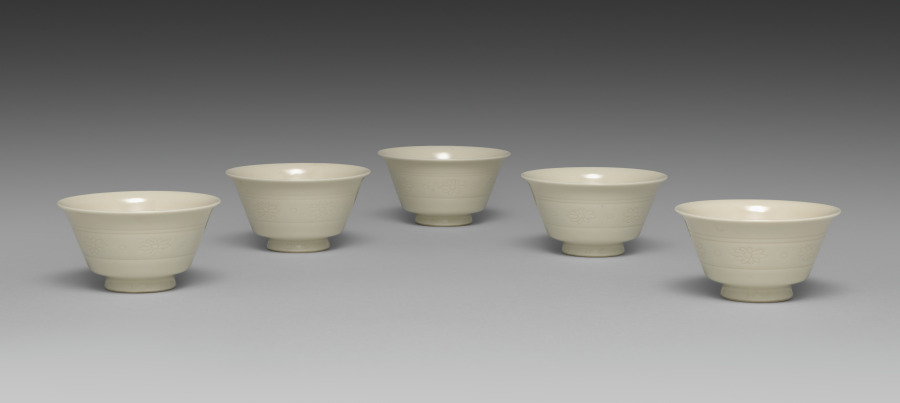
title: Teacups with Floral Band Motif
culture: Japan, Meiji period (1868–1912)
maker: Seifū Yohei III (Japanese, 1851–1914)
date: 1893–1914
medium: Set of five teacups; porcelain with incised decoration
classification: Ceramic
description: The five sencha teacups in this set are decorated with incised flowers and dots between a double band at the top and a single band at the bottom. They are in Yohei III’s creamy taihakuji body and glaze. In their motifs, they are quite similar to an incense burner by Yohei III (see CMA 2022.180), but the flowers are even more simple in design, with no open circle at the center. A label affixed to the side of the box refers to them as “sencha cups in emulation of Korean white [ware].” The reference to Korean ware indicates that even though Yohei was more directly inspired by Qing dynasty wares from the Dehua kilns in Fujian Province in developing his porcelain clay and glaze for works such as these, the general understanding of the continental models still placed them, at least in terms of color, among pieces broadly associated in Japan with Korean white wares. The delicate cups are thinly potted, so they have a highly desirable translucency.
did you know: The delicate cups are thinly potted, so they have a highly desirable translucency.